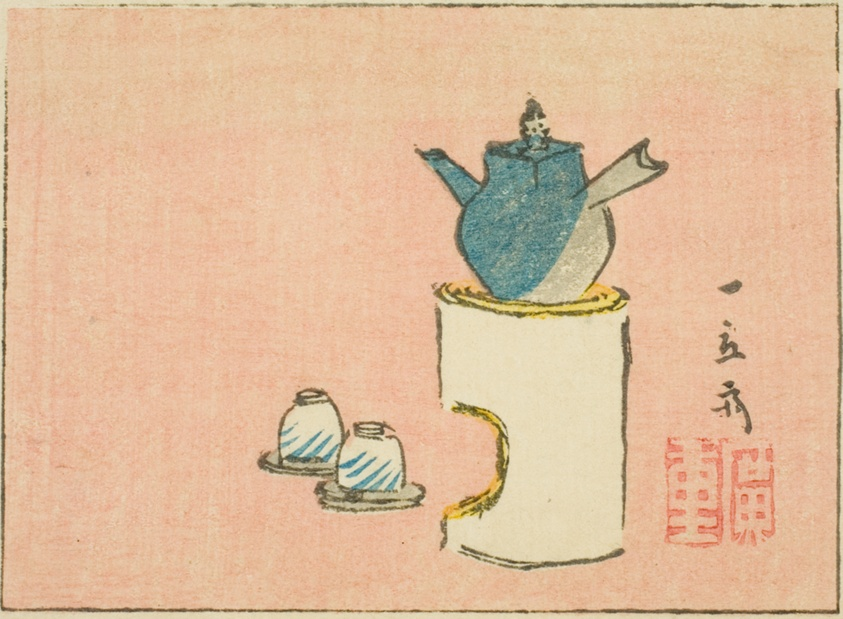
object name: Print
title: Teapot and cups, section of a sheet from a series of untitled harimaze prints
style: Japanese (culture or style)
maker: Utagawa Hiroshige 歌川 広重; Japanese, 1797-1858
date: c. 1850s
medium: Color woodblock print; section of harimaze sheet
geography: Japan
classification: woodblock print; print; asian art